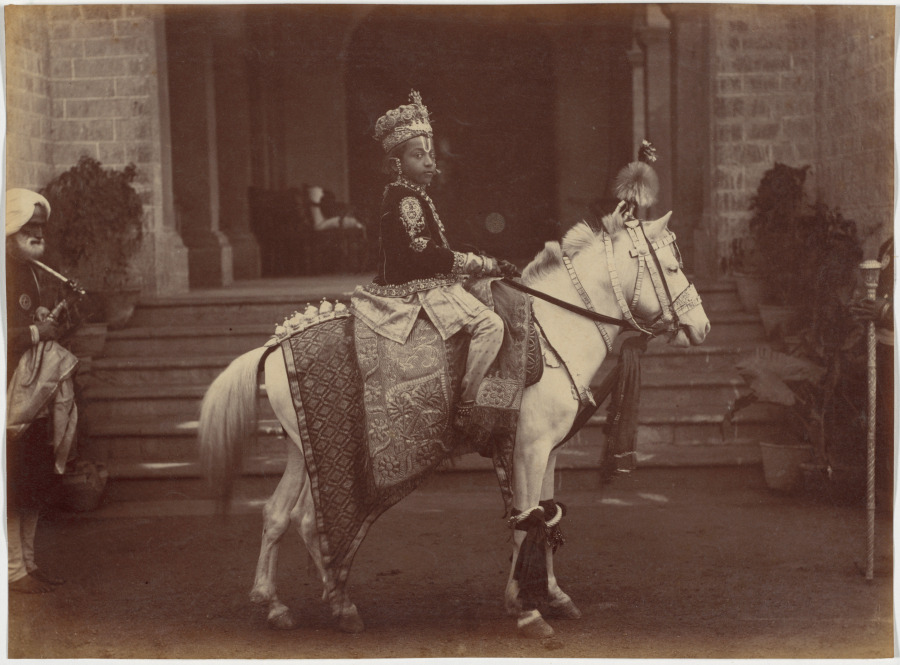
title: His Highness the Maharaja of Rewa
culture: India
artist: Raja Deen Dayal (Indian, 1844–1905)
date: 1886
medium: albumen print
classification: Photograph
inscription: No visible inscriptions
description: Deen Dayal’s status as an Indian person may have helped him gain access to Indian rulers at the start of his career. The year before he received the patronage of British officials, Deen Dayal photographed ten-year-old Venkat Raman Singh (1876–1918; reigned 1880–1918), the Maharaja of Rewa. The studio portrait reveals the boy beneath the crown. He straddles a Western-style chair that is too tall for him, curling under his stockinged feet so they touch the floor. One of his many necklaces holds a painted or photographic portrait similar to the portrait jewel pendant in the nearby case.